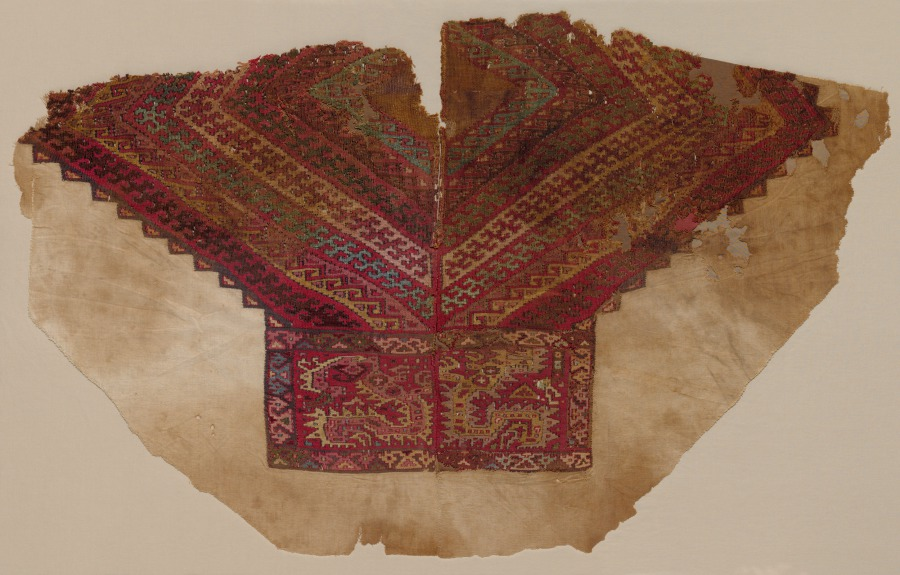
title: Tapestry-woven Yoke from a Tunic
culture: Central Andes, North Central Coast, Moche-Wari Style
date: 800–1200?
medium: camelid fiber and cotton, tapestry weave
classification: Textile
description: This fragment comes from the upper area of a tunic, with thick embroidery defining remnants of the neck opening. In the rectangular area on the chest are two similar long-tailed creatures rendered in a highly geometric style. Each is rotated 90 degrees, so their tails are parallel to the bottom edge. The cloven hooves on their upper legs may identify the creatures as deer or Andean camelids, such as llamas or alpacas.